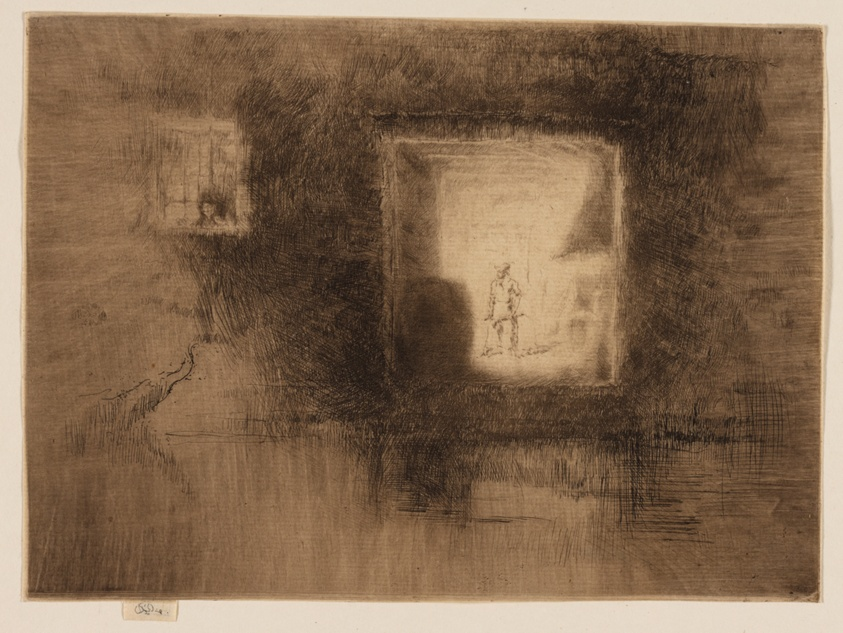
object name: Print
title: Nocturne: Furnace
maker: James McNeill Whistler (American, 1834-1903)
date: 1879/80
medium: Etching and drypoint with foul biting in dark brown ink on cream laid paper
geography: United States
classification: etching; foul biting; print; prints and drawing; drypoint; paper